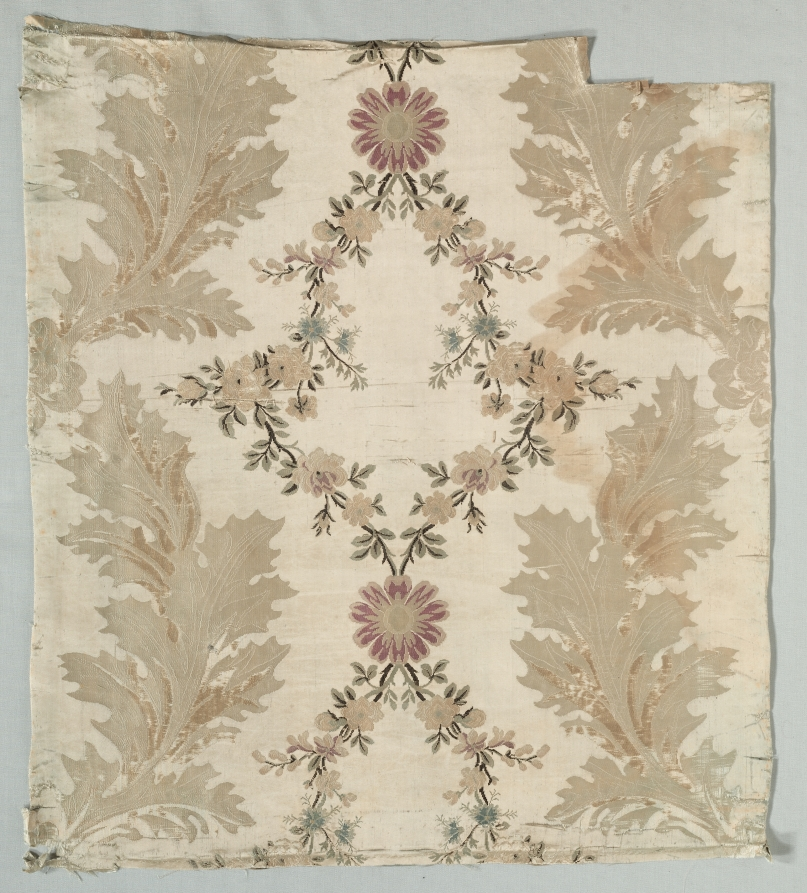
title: Length of Brocaded Textile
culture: France, 18th century, Period of Louis XVI (1774-1793)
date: c. 1775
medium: lampas weave, brocaded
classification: Textile